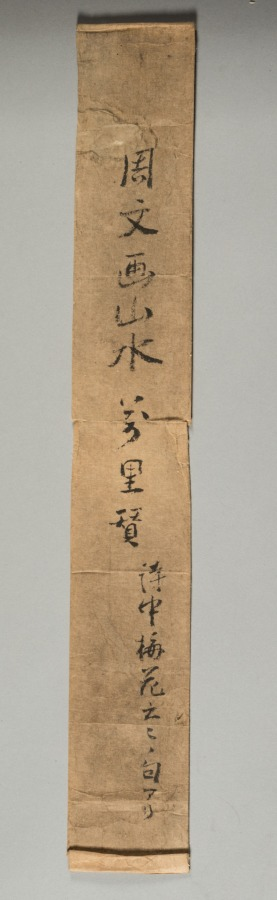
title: Lonely Temple and Towering Cliff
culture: Japan, Muromachi period (1392–1573)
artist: circle of Kenkō Shōkei (Japanese, active 1478–1506)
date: c. 1480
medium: hanging scroll; ink and slight color on paper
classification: Painting